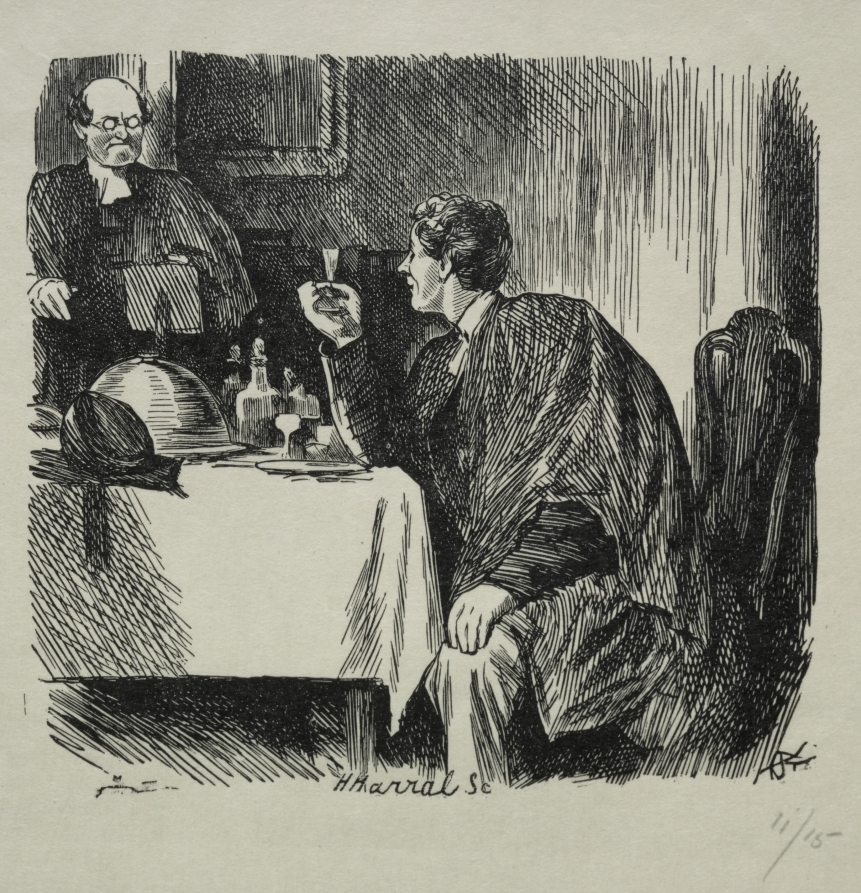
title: Tomkin's Degree Supper and How it Ended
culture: England, 19th century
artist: Charles Samuel Keene (British, 1823–1891)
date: 1868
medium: wood engraving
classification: Print